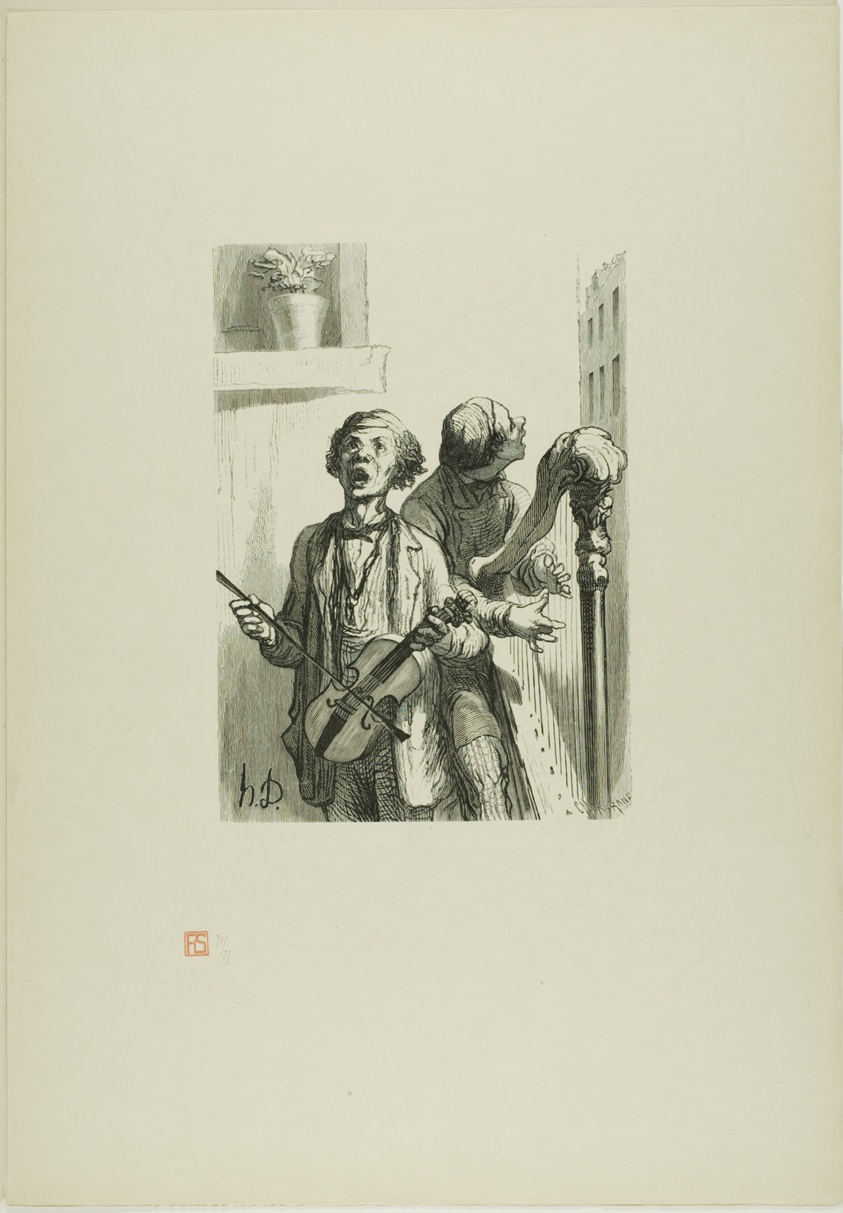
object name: Print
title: The Street Singers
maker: Charles Maurand (French, 1824-1904); after Honoré Victorin Daumier (French, 1808-1879); printed by François Louis Schmied (Swiss, 1873-1941); published by Jules Meynial (French, 20th century)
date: 1862, printed 1920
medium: Wood engraving on cream Japanese paper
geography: France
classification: wood engraving; print; prints and drawing